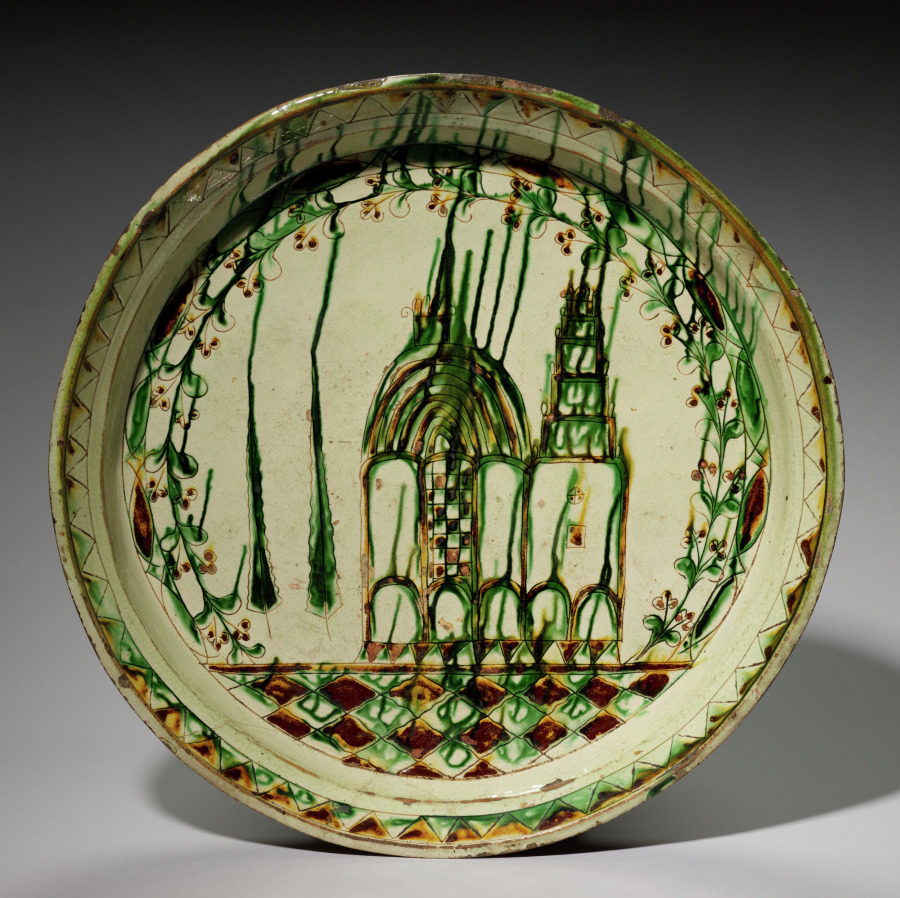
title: Plate: Majolica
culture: Mexico, 18th century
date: 1700s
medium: tin-glazed earthenware (maiolica)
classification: Ceramic